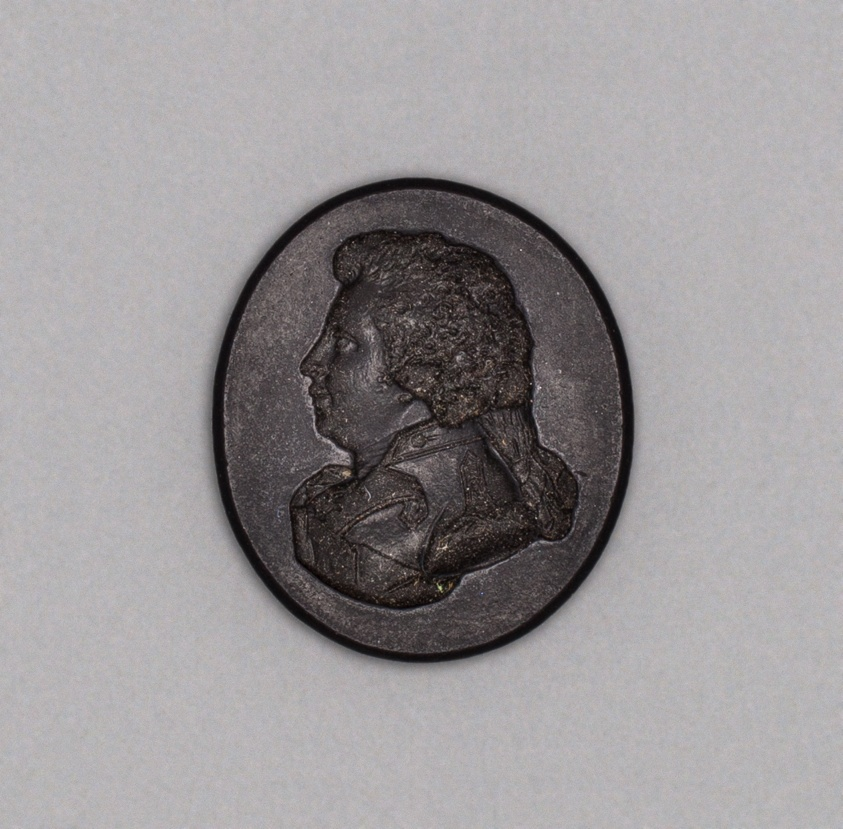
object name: Ceramics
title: Intaglio with Bust of a Man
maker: Wedgwood Manufactory (England, founded 1759)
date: Late 18th century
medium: Stoneware (basaltware)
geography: Burslem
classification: sculpture; stoneware; european decorative arts; ceramics